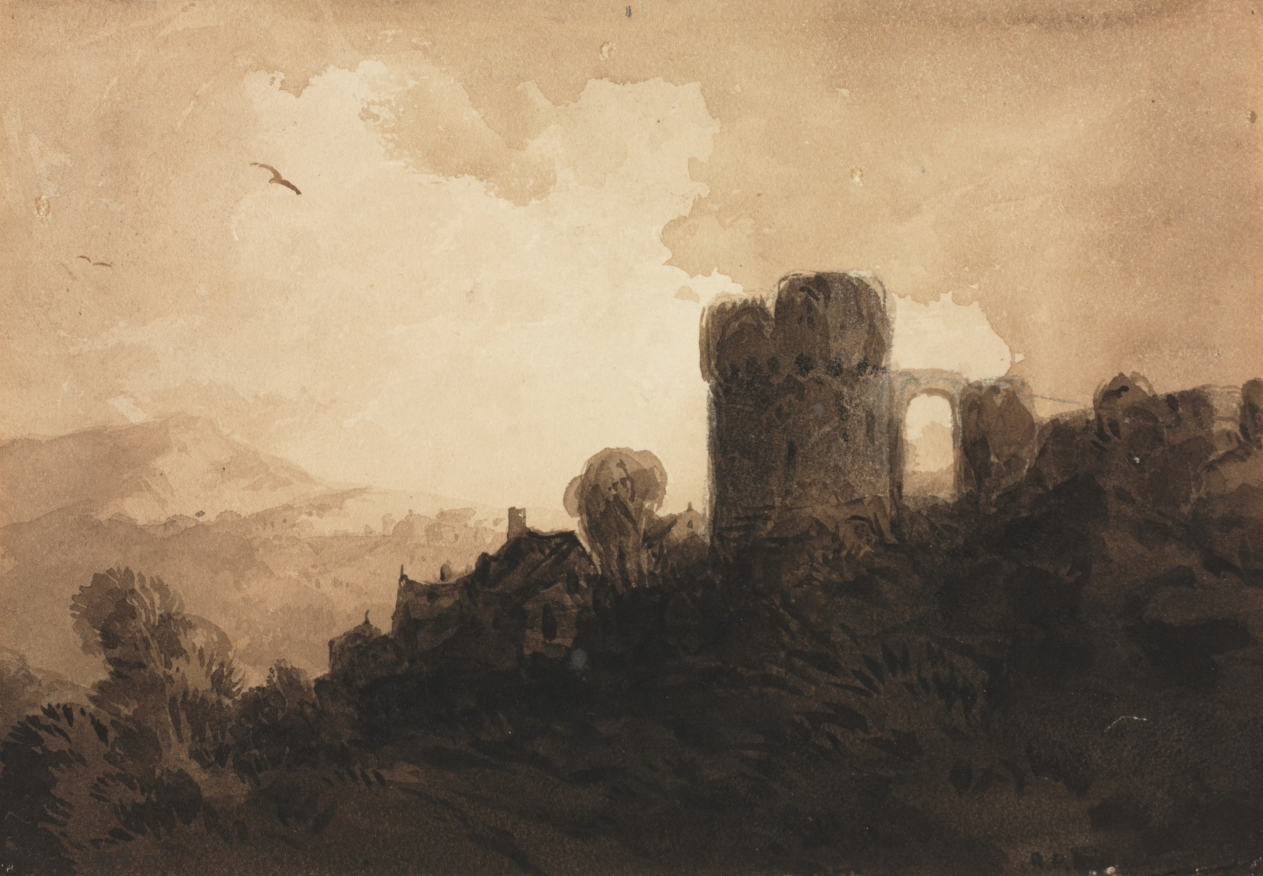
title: Landscape with Castle Ruin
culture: England, 19th century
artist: Richard Parkes Bonington (British, 1802–1828)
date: c. 1817–28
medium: brown wash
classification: Drawing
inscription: Signed lower right